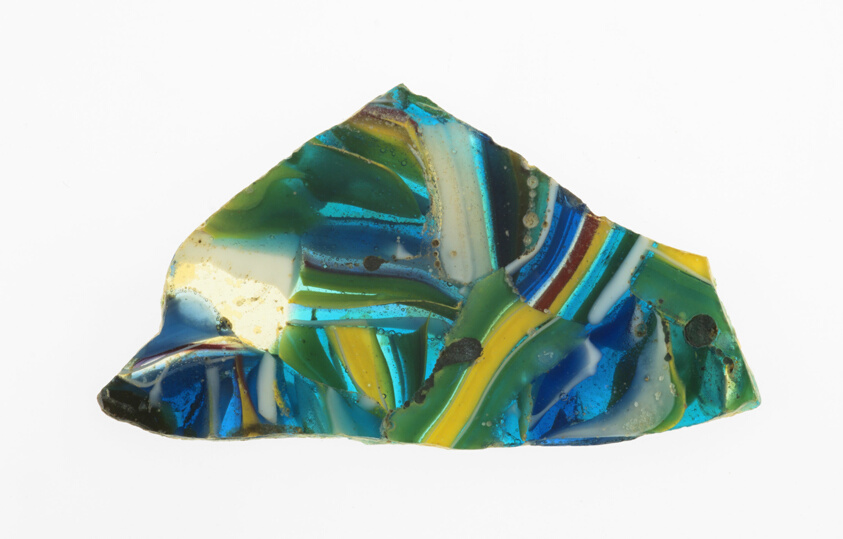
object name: Decorative Arts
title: Fragment of a Vessel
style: roman (ancient, style or period), ancient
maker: Roman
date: 1st century BCE–1st century CE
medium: Glass, mosaic glass technique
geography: Roman Empire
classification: fragment; decorative arts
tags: decoration